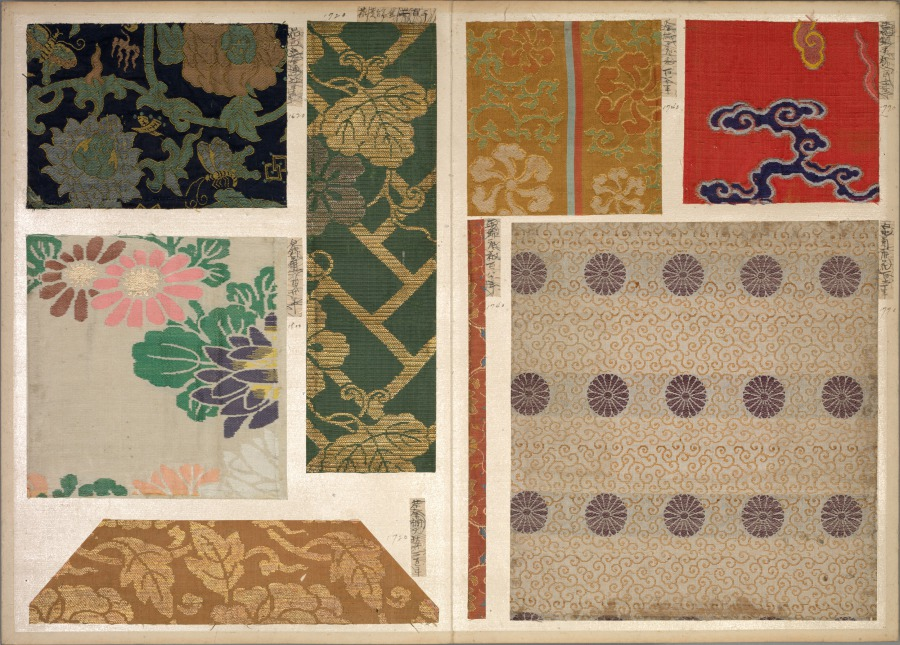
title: Album of Textile Samples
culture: Japan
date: 1790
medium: silk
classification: Textile